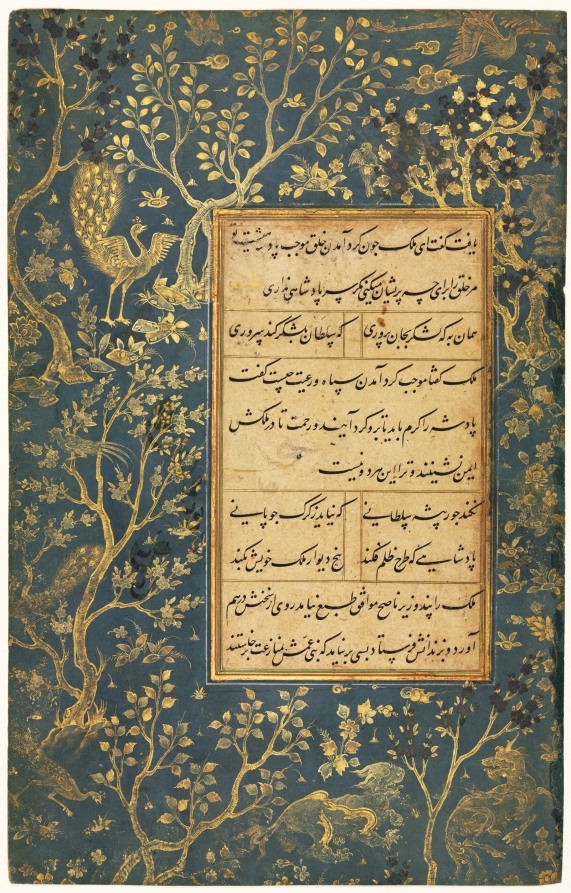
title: Illuminated Folio (recto) from a Gulistan (Rose Garden) of Sa'di (c. 1213–1291)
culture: Afghanistan, Herat, Timurid period (1370–1501)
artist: Sultan 'Ali al-Mashadi (Iranian, 1430–1520)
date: c. 1475–1500; border: c. 1550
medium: Gum tempera, ink, gold, and silver on paper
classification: Manuscript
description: In the border surrounding the Persian poetical text, deer and a lion coexist peacefully in a forest. This imagery may reference the rule of a righteous king. The text is from the Gulistan, one of the most celebrated works of Persian literature, completed around 1258. Gulistan means “Rose Garden” in Persian; just as a rose garden is a collection of flowers, the contents are a collection of anecdotes. This page is from the section “On the Conduct of Kings.”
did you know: The exquisite border was painted in gold and silver that has tarnished over time.